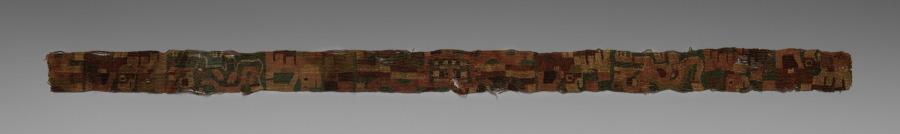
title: Fragment of a Belt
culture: Peru, South Andes, Tiwanaku style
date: c. 400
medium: camelid wool; tapestry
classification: Textile